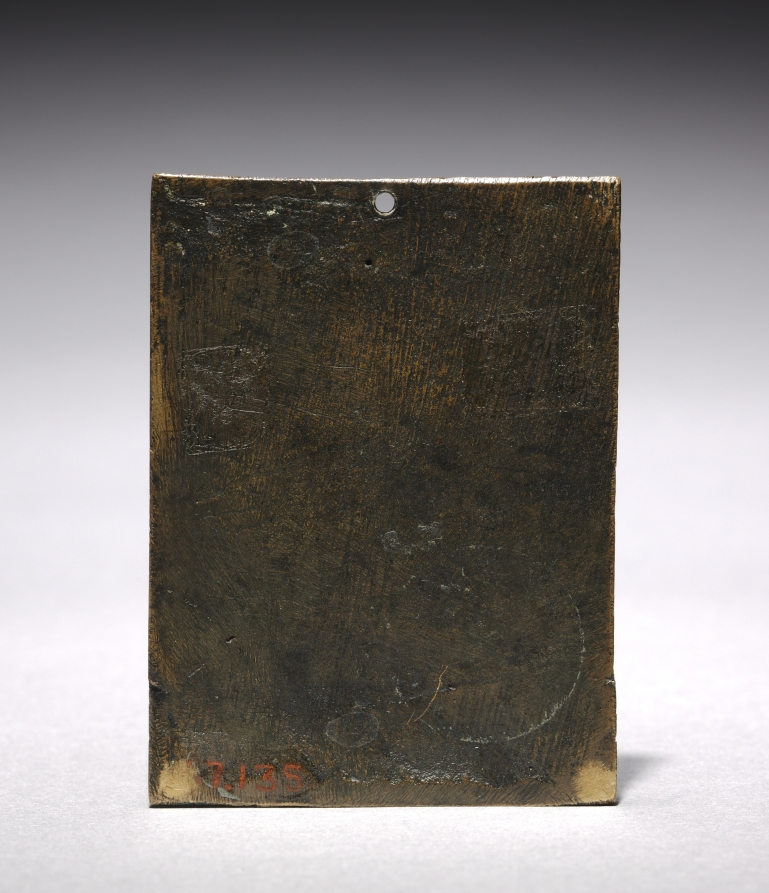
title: Hercules and the Nemean Lion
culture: Italy, 16th century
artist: Moderno (Italian, 1467–1528)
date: 16th century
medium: bronze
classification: Sculpture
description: This plaquette by Moderno, a Northern Italian sculptor active in the early 1500s, displays the ancient subject of Hercules wrestling the Nemean lion. The subject of this plaquette finds its origins in the ancient myth of the Twelve Labors of Hercules, a popular theme during the Renaissance. After killing his wife and child in a fit of rage, Hercules was sent by an oracle to be punished by King Eurystheus of Tiryns. The King presented Hercules with twelve challenges, the first of which was to kill the Nemean lion. Twice as large as a normal lion, it had an impenetrable hide, symbolic of the uncontrollability of nature. Hercules tracked the lion to its cave, and after failing to kill it with the arrows of Apollo, Hercules strangled the lion with his bare hands. As Hercules' strength allowed him to defeat the lion, the myth expresses human dominance over nature. Hercules then used the lion's razor-sharp claws to remove its skin and returned to King Eurystheus wearing the impenetrable skin as protection. To honor the lion's struggle against Hercules, Zeus transformed the lion into the constellation Leo. In this scene, the nude Hercules stands in profile facing left with his left foot resting on the plaquette's lower border. The plaquette has no background other than a barren tree against which rest Hercules's club and Apollo's quiver and bow. The lion rests its rear paw on Hercules' thigh as Hercules lifts the lion off of the ground. The lion's body and mane consists of stylized tufts of fur which contrast with the smooth, naturalistic form of Hercules' body. The minute, short curling lines of the hair and mane create a rhythmic effect while the smooth curves of the forms place an emphasis on contour-this contrast of visual rhythm with smooth form is in fact characteristic of Moderno's bronze relief sculpture. The composition meanwhile has its origin in ancient Greek coins as well as Renaissance cameos.